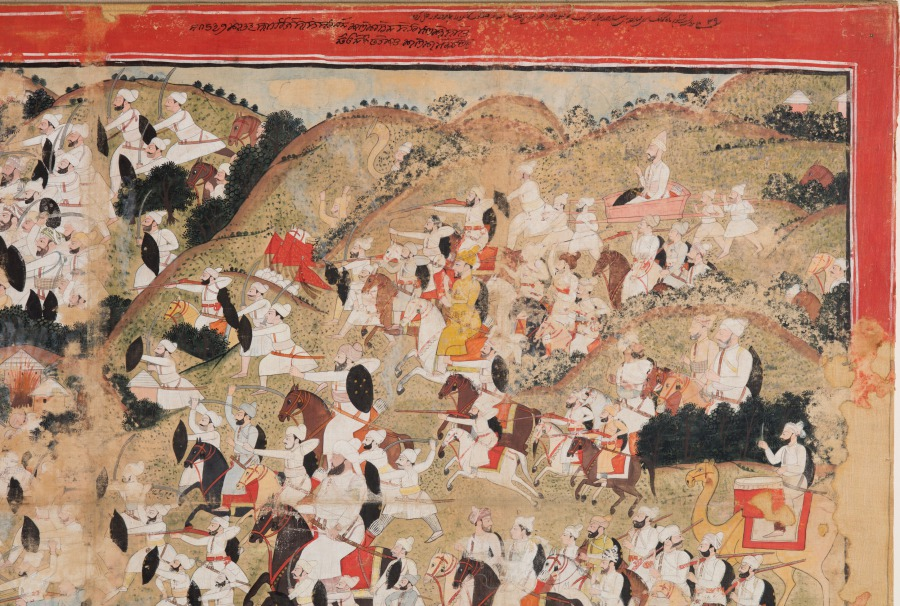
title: Raja Sansar Chand attacking Kangra Fort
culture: Northern India, Pahari kingdom of Kangra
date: after 1782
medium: Gum tempera, ink, and gold on cotton cloth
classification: Painting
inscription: Inscriptions in Takri and Persian. Persian reads: “On the 23rd of the month of Kartik, Samvat 1839 (1782 AD) Sri Maharaja Sansar Chand Bahadur attached Lakkarkot (Nagrakot ?) and the fortress of Kangra, attained victory and made siege intrenchments at the fortress of Kot Kangra.”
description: In 1782, the 17-year-old king of Kangra fought to retake his ancestral kingdom from the Mughals, who had controlled the territory since 1620. He rides a dark brown horse in front of the camel at the far right, blending in among his army and allies. The leftmost panel shows the residents of Kangra fleeing the conflict with their belongings on their heads to the safety of the fortress at the far left, from the walls where cannons are being fired. The main temple, built of gray stone, is in the middle of the composition, marked by red flags.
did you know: The king is 17 years old, beardless, riding a dark brown steed in front of the camel at the far right.